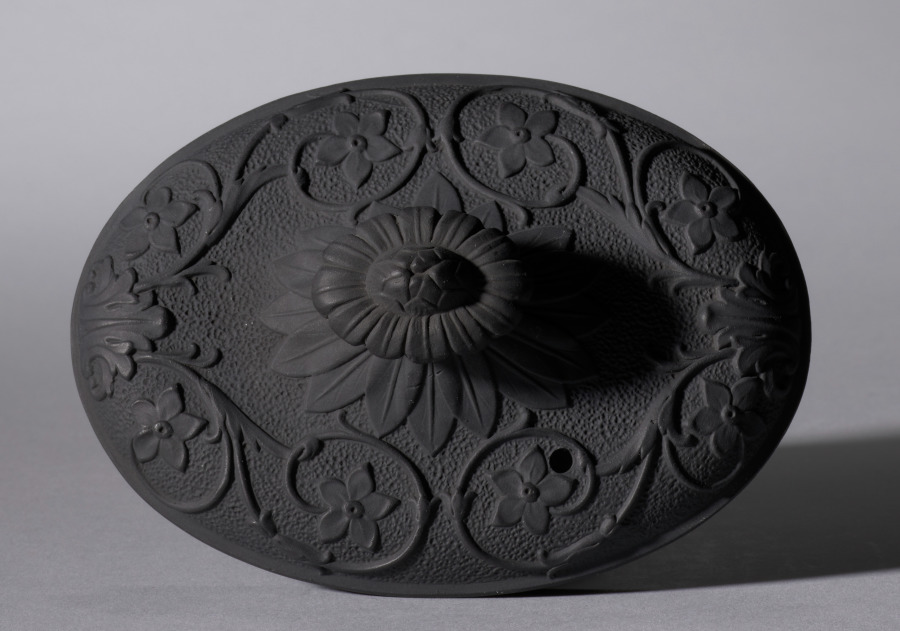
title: Teapot (cover)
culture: England, 19th century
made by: Elijah Mayer (British, c. 1770–1805)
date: c. 1810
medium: black basalt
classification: Ceramic